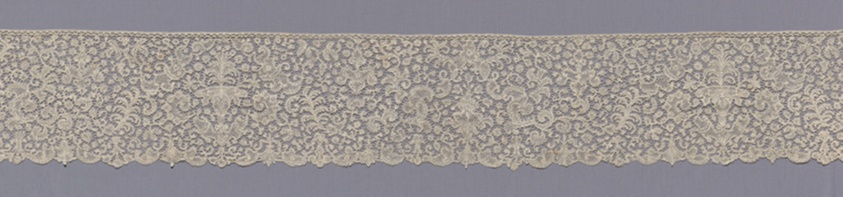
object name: Textile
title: Lace Flounce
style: 18th Century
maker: Flanders, Brussels (present day Belgium)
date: 1701-25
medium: Linen, bobbin part lace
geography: Flanders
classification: textile; lace - bobbin; lace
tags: fountains, cartouches, arabesque, vines